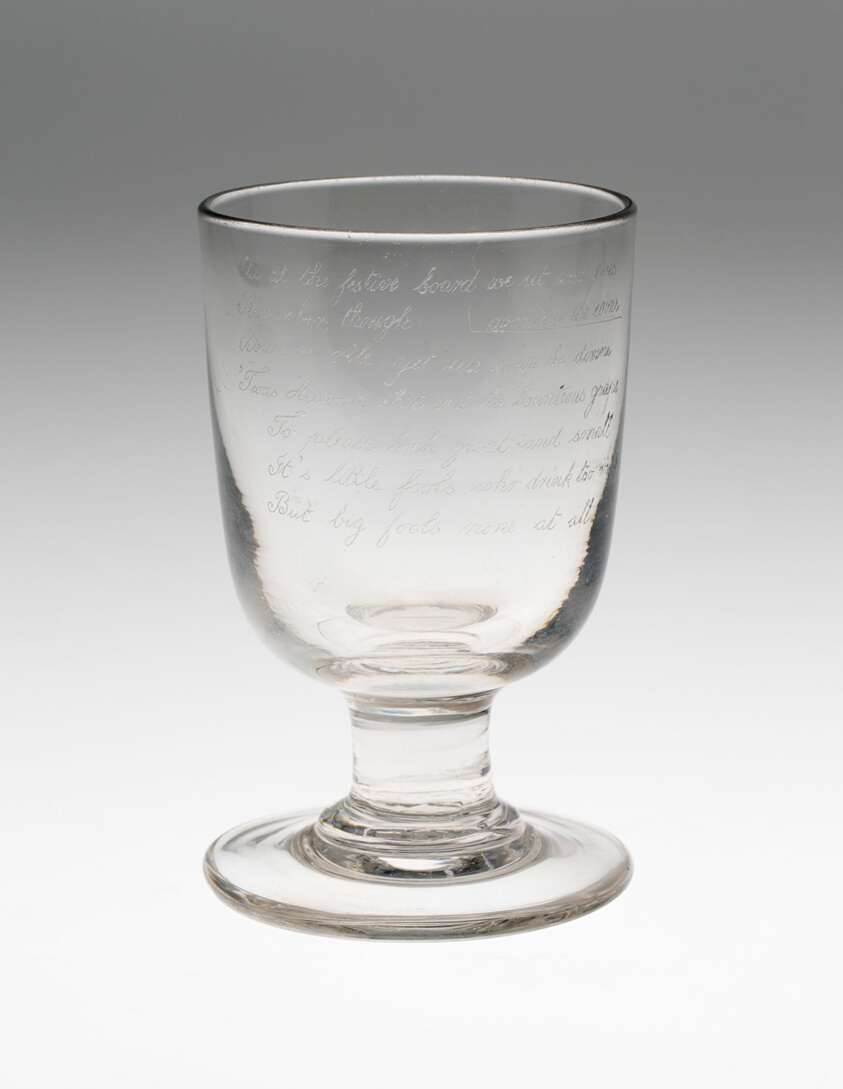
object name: Glass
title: Goblet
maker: England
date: c. 1820/30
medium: Glass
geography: England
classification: drinking vessel; glass; european decorative arts